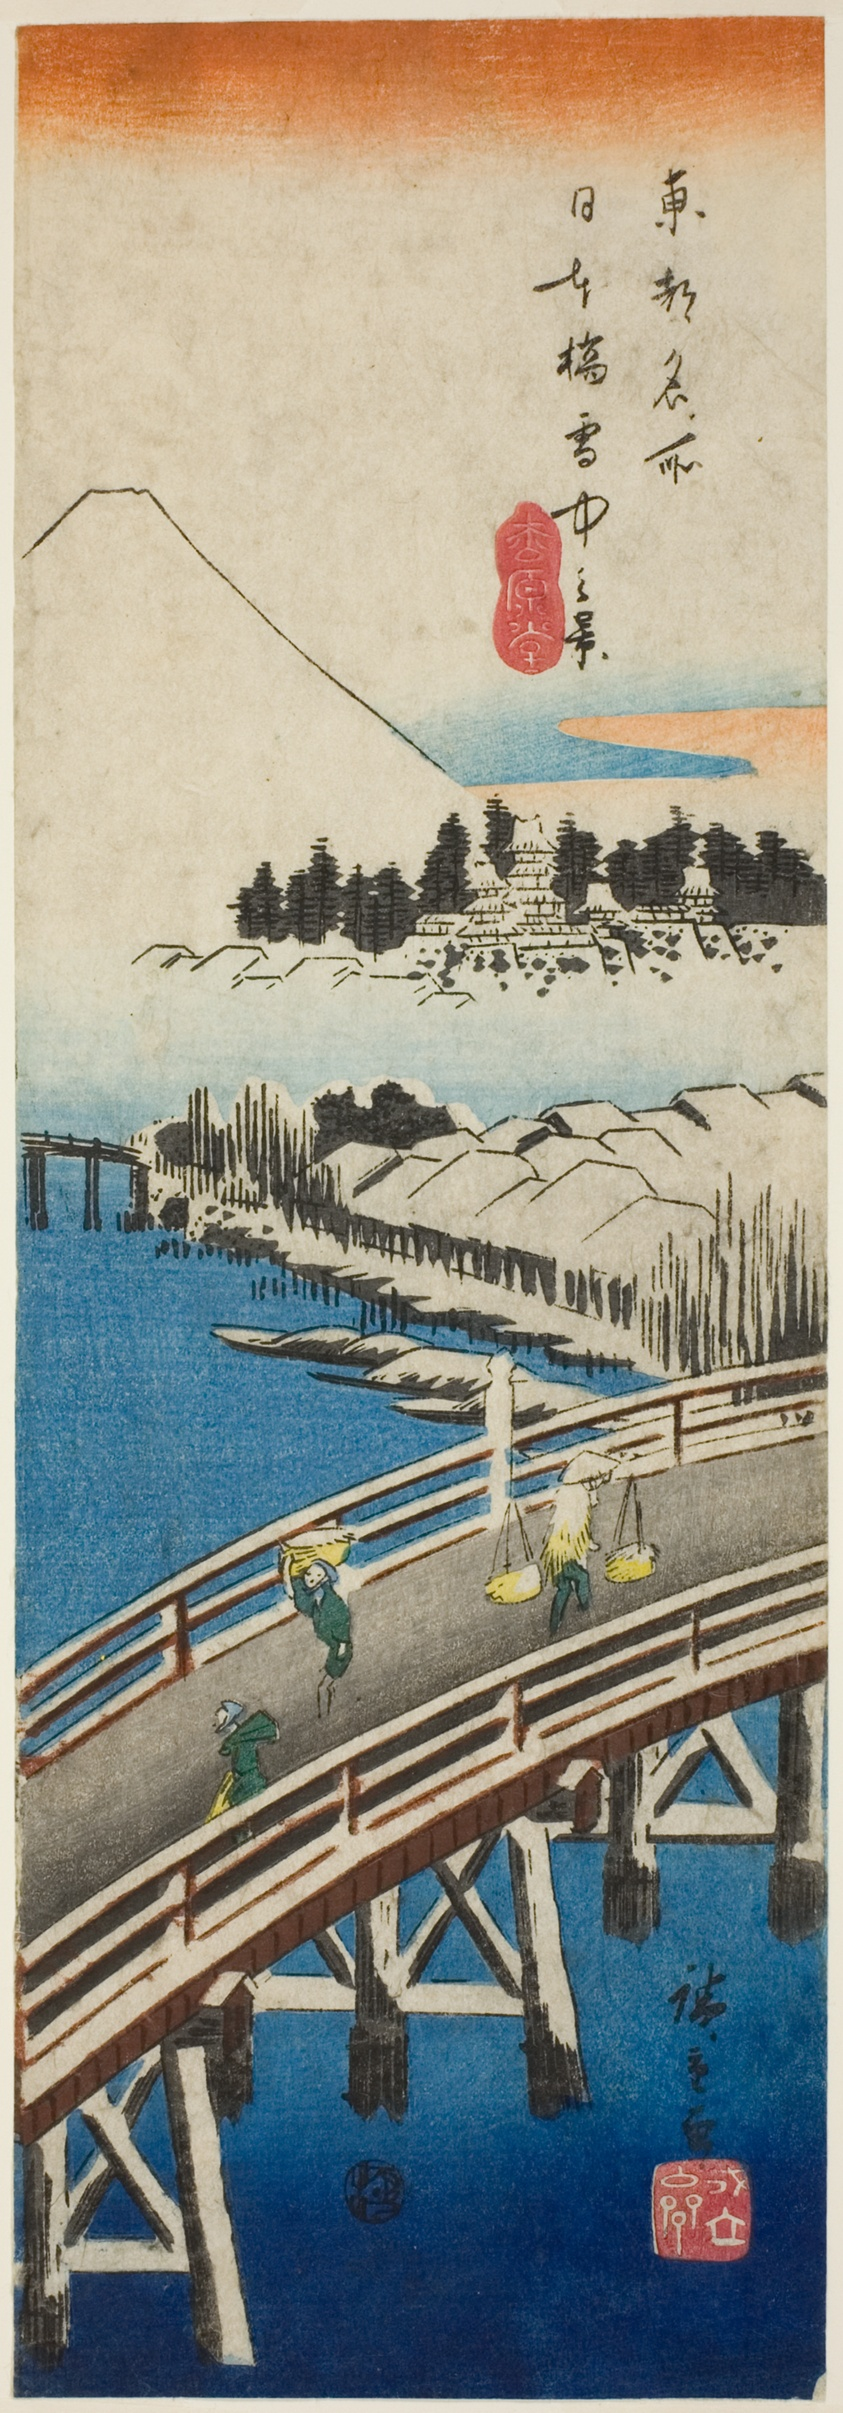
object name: Print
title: Nihon Bridge seen in the Snow (Nihonbashi setchu no kei), from the series "Famous Views in the Eastern Capital (Toto meisho)"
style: Japanese (culture or style)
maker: Utagawa Hiroshige 歌川 広重; Japanese, 1797–1858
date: 1837/38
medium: Color woodblock print; chu-tanzaku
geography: Japan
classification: woodblock print; print; asian art